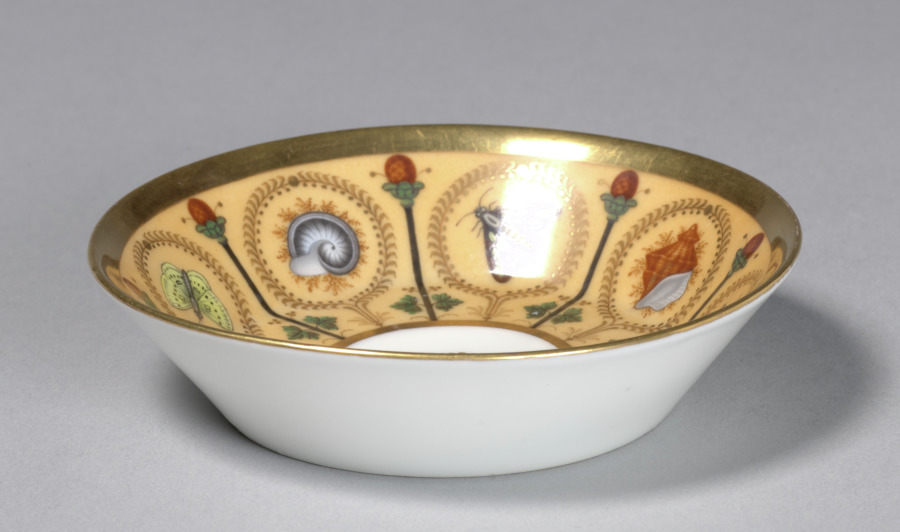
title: Saucer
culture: France, 19th century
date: c. 1800–1810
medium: porcelain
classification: Ceramic